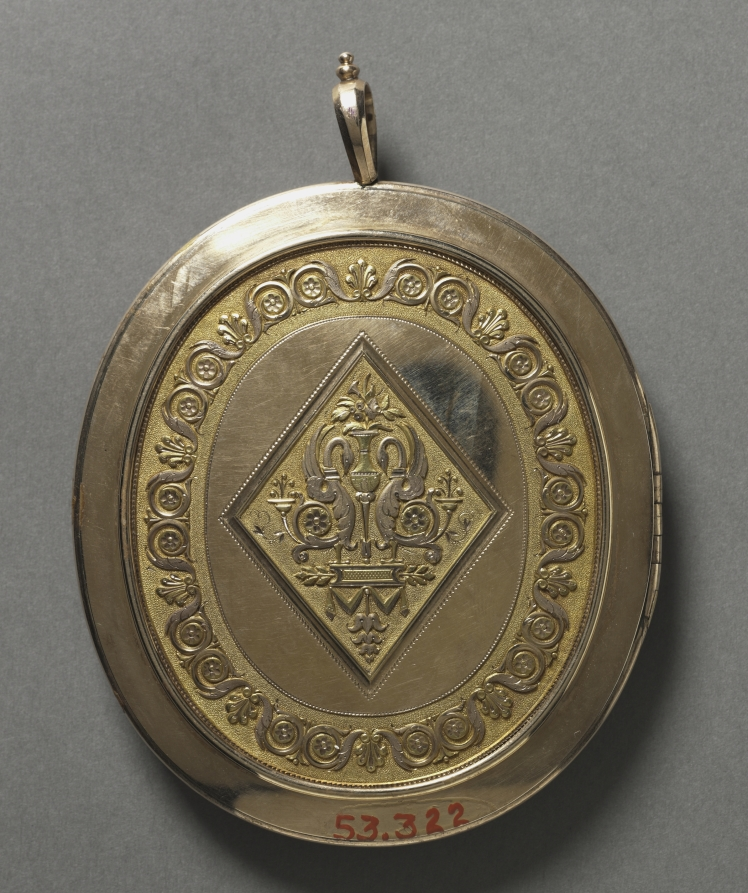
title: Portrait of Louis-Philippe, Duke of Orléans, later King of the French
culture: England, early 19th Century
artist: Richard Cosway (British, 1742–1821)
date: 1804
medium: watercolor on ivory in a gold locket frame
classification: Portrait Miniature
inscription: signed on backing: Rdus Cosway / R.A. et F.S.A. / Primarius Pictor / Serenissimi Walliae / Principie / Pinxit / 1804.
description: Louis-Philippe (1773–1850, king of the French 1830–48) was the son of Louis-Philippe Joseph, duc d’Orléans, who was known as Philippe-Egalité during the French Revolution. The Orléans family was a branch of the House of Bourbon. This work was painted while Louis-Philippe was in exile and living in England from 1800 until 1815, when Napoleon abdicated. He finally succeeded Charles X as king of France in 1830. During the February Revolution of 1848, Louis-Philippe was again forced into exile in England where he died two years later. Richard Cosway had painted Louis-Philippe (as well as his siblings and father) when the family was in England immediately following the outbreak of revolution in 1789. Louis-Philippe would have been thirty-one years old when this work was executed. He wears the Order of the Holy Spirit, a chivalric order of the French monarchy, which can be distinguished by its white dove surrounded by green flames at the center of a Maltese cross, with fleur-de-lis between the arms of the cross. Instead of the brilliant turquoise and white cloud background traditionally associated with Cosway, this miniature has the more restrained, gray, hatched background that characterizes the artist’s later works. The surface of the work is much marred by an irreversible crystallization of the paint layer that further emphasizes the gray tones throughout. The form of the unmarked case is typically English, but the motif is French, which may indicate a French goldsmith imitating the English style. The motif resembles a swan composed of foliate scrolls. A lock of plaited brown hair is also enclosed under glass within the locket, facing the miniature.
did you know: Without DNA analysis it is impossible to know to whom the hair belonged, though the most likely candidate is Louis-Philippe himself.